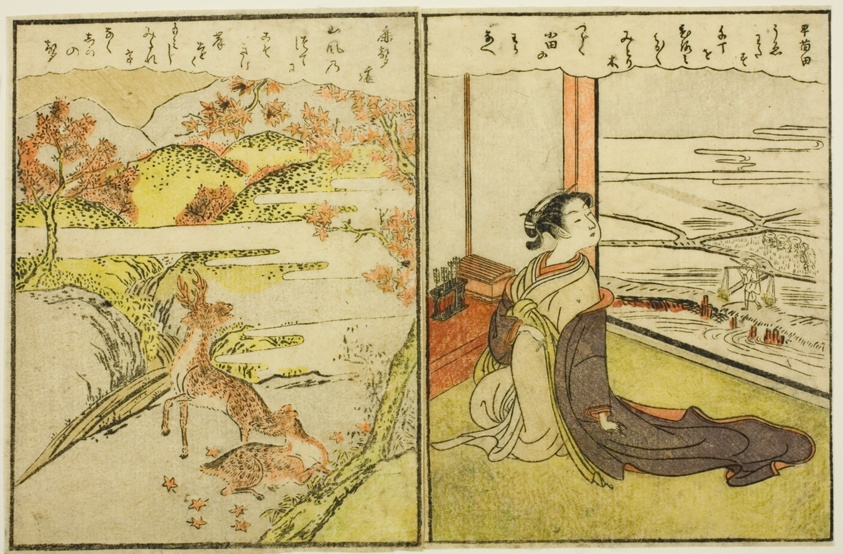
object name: Print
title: Pages from Vol. 1 and 2 of "Picture Book of Spring Brocades (Ehon haru no nishiki)"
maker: Suzuki Harunobu 鈴木 春信; Japanese, 1725 (?)-1770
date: 1771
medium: Color woodblock print; double-page illustration from book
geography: Japan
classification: woodblock print; print; asian art